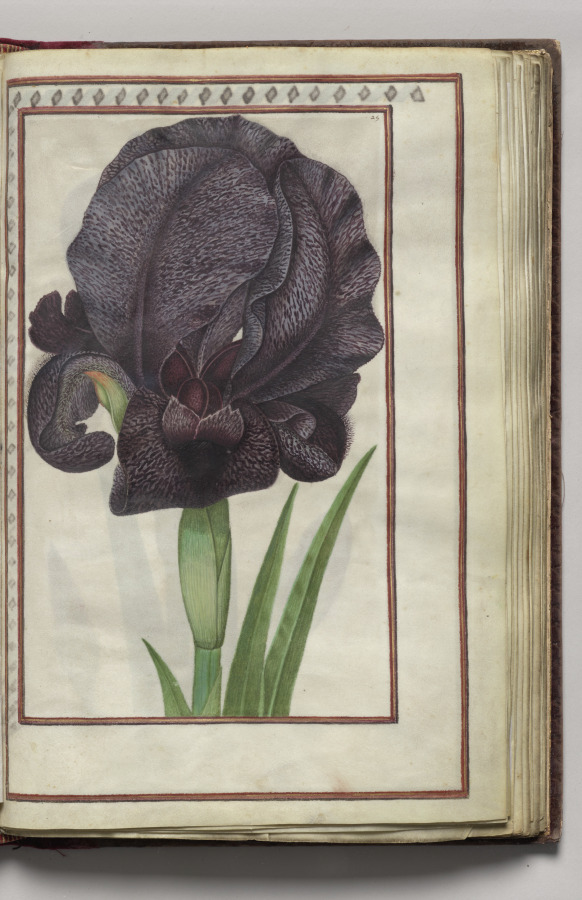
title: Iris, folio 15 (recto), from Florilegium (A Book of Flower Studies)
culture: France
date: 1608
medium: watercolor, ink, silver, and gold over occasional traces of pencil, on vellum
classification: Bound Volume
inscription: Dated: Poitiers 1608 (on frontispiece) Signed: On frontispiece in black ink, lower right: Van Kuyk Notation on drawing: Frontispiece: in pencil, lower margin: * élève de Van Kessel, peintre flammand (* in pencil also appears in front of Van Kuyk's name).